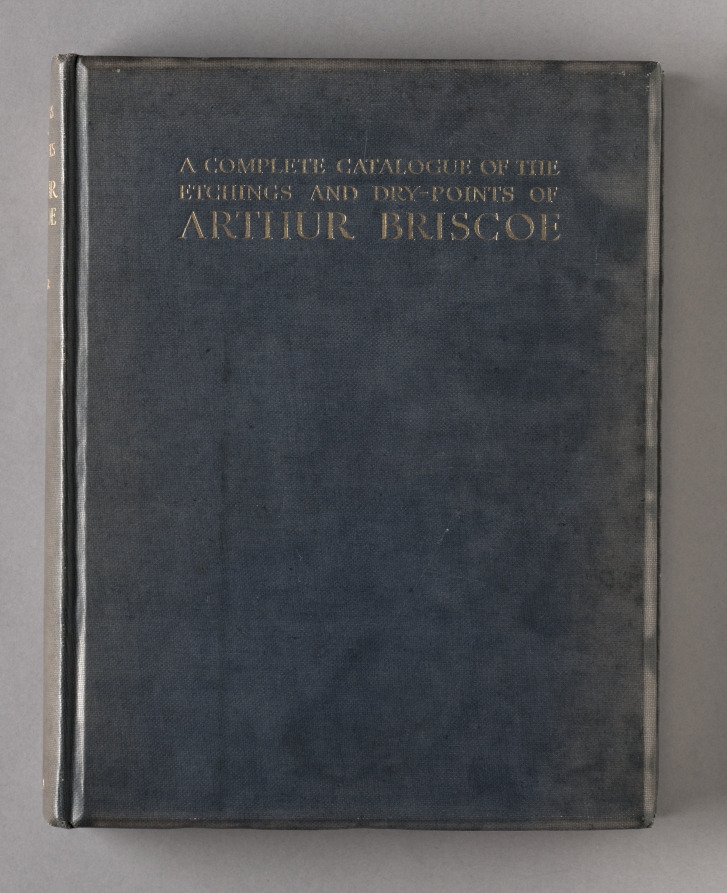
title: The Anchor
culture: England, 20th century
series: A Complete Catalogue of the Etchings and Drypoints of Arthur Briscoe: The Anchor by James Laver, London, Halton and Truscott, 1930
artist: Arthur John Trevor Briscoe (British, 1873–1943)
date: 1930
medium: etching contained within a book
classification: Print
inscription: Lower right, in pen and ink: Arthur Briscoe